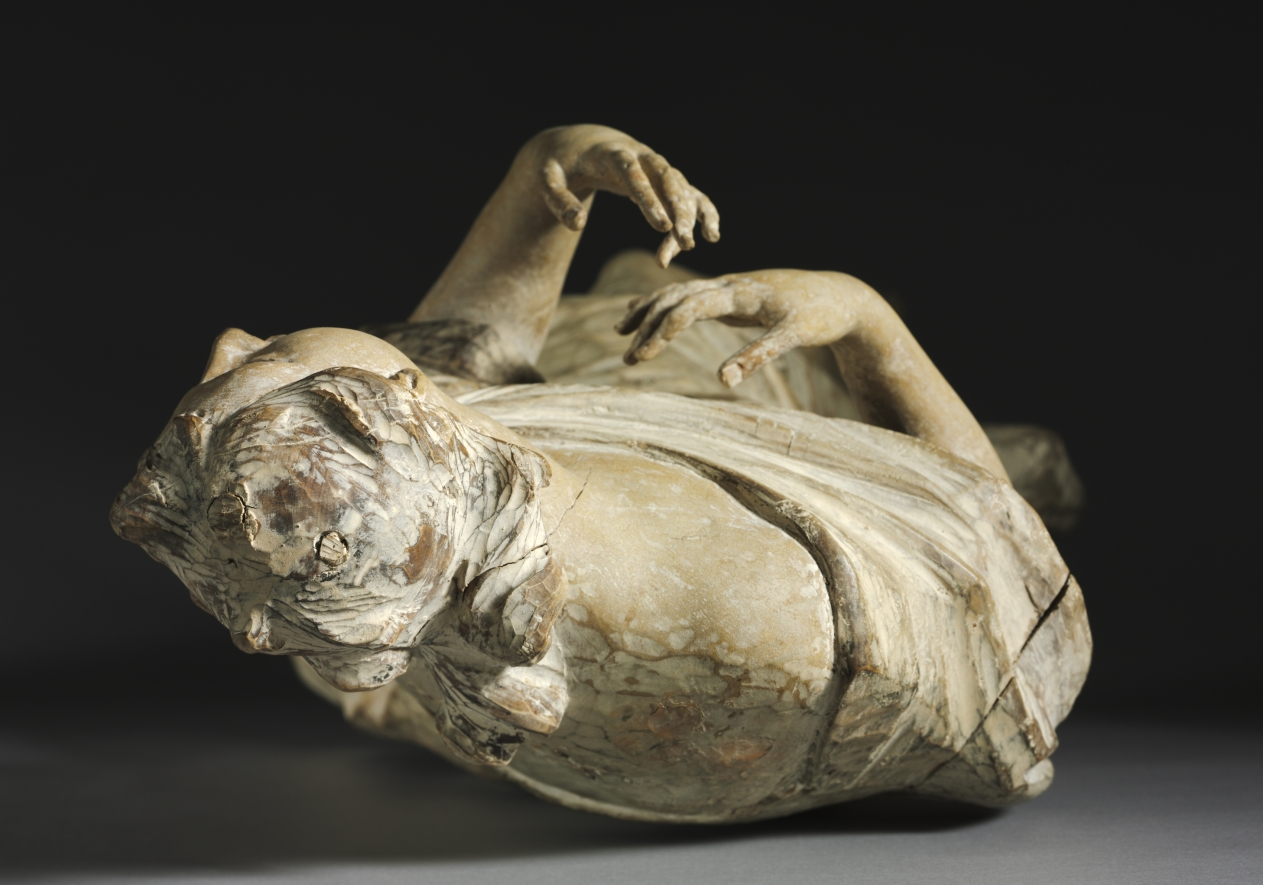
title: Kneeling Angel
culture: Germany, Munich, 18th century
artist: Ignaz Günther (German, 1725–1775)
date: c. 1760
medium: gessoed and painted wood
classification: Sculpture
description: This angel, and another now in the Philadelphia Museum of Art, were probably originally placed on either side of a tabernacle—a structure designed to hold the consecrated bread and wine of the Eucharist—on an altar in a Christian church or private chapel. The angels would originally have had wings, and the now plain surface of the sculpture would have been painted or gilded. Ignaz Günther was among the most sought-after carvers of religious sculpture in southern Germany. His virtuoso skill is particularly evident here in the angel’s pious expression and elegantly formed hands and feet.